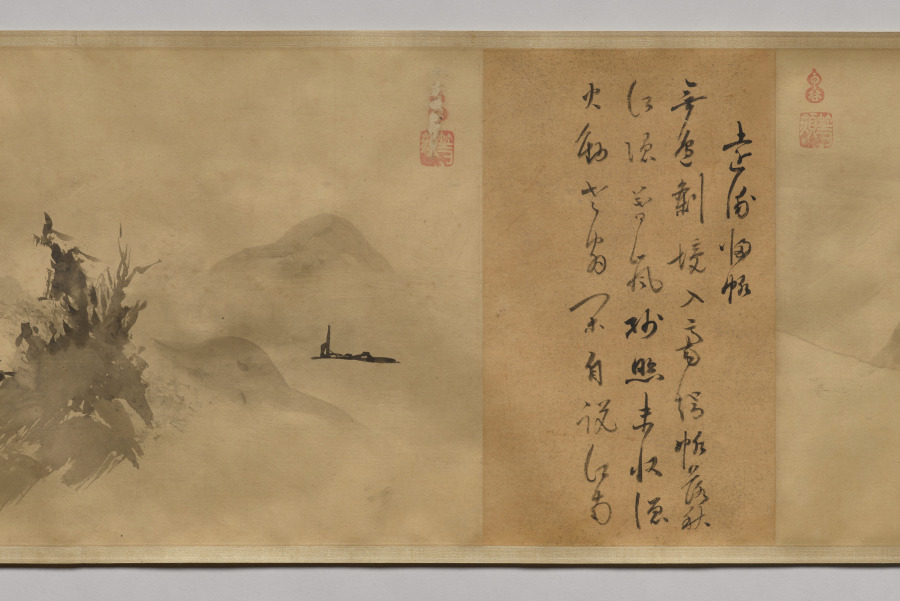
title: Poems and Pictures of the Eight Views of Xiao-Xiang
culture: Japan, Momoyama period (1573–1615)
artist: Unkoku Tōgan (Japanese, 1547–1618)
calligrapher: Inkei Gentetsu (Japanese, 1562–1612)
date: 1605–12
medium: Handscroll; ink on paper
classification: Painting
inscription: Each painting sealed with red gourd-shaped seal reading Unkoku (雲谷) and a square seal reading Tōgan (等顔).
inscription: Each painting prefaced with a titled poem on the Eight Views of Xiao-Xiang by Yujian Ruofen (active late 13th century) inscribed by Japanese Buddhist monk Inkei Gentetsu (1562–1612).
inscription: 右寫玉㵎之筆勢／雪舟末葉等顔筆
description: Unkoku Tōgan brushed these scenes using the splashed-ink technique associated in Japan with the Chinese monk Yujian Ruofen (active late 1200s). Xiao-Xiang refers to the region in present-day Hunan province, where the Xiang River and its tributaries converge. Each of the eight views evokes a time of day or season. The earliest surviving series of Xiao-Xiang paintings is by Wang Hong (active mid-1100s), but textual evidence tells us the theme appears earlier. It was later adopted in Japan and Korea, as seen here. The poems were inscribed by Inkei Gentetsu, the third abbot of the Rinzai Zen temple Tōshunji, Japan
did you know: The “Tō” of Tōgan comes from the name of painter Sesshū Tōyō (1420–1506).